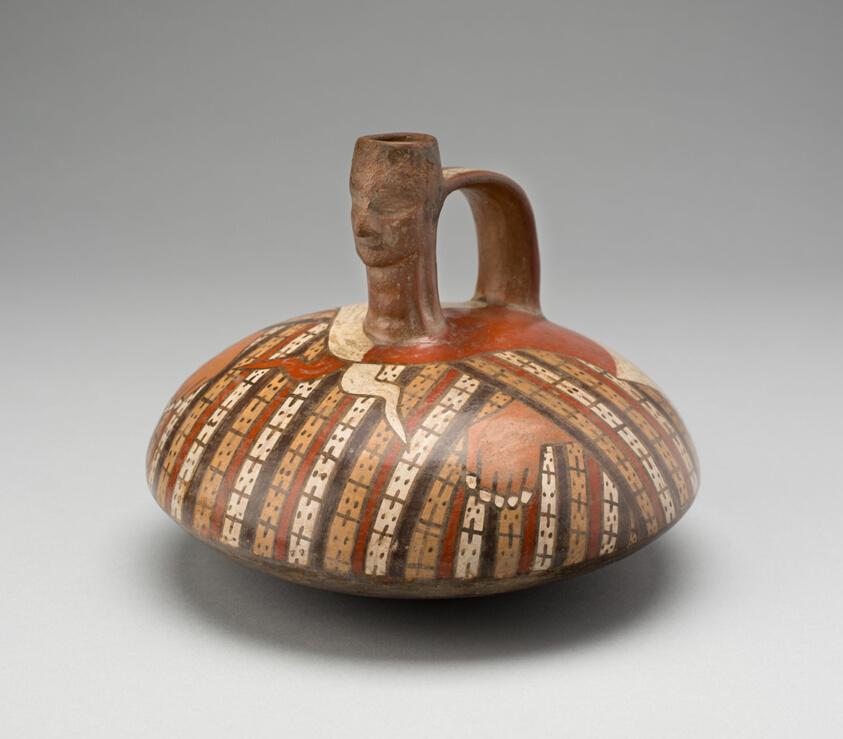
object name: Vessel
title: Vessel in the Form of the Head and Torso of a Figure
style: tiahuanaco, middle horizon, Pre-Columbian, americas, andes, Arts of the Americas, andean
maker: Nazca/Tiwanaku-Wari; South coast, Peru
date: 600–1000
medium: Ceramic and pigment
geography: Southern Peru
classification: earthenware; art of the americas; ceramics; vessel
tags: abstract figures, textile pattern